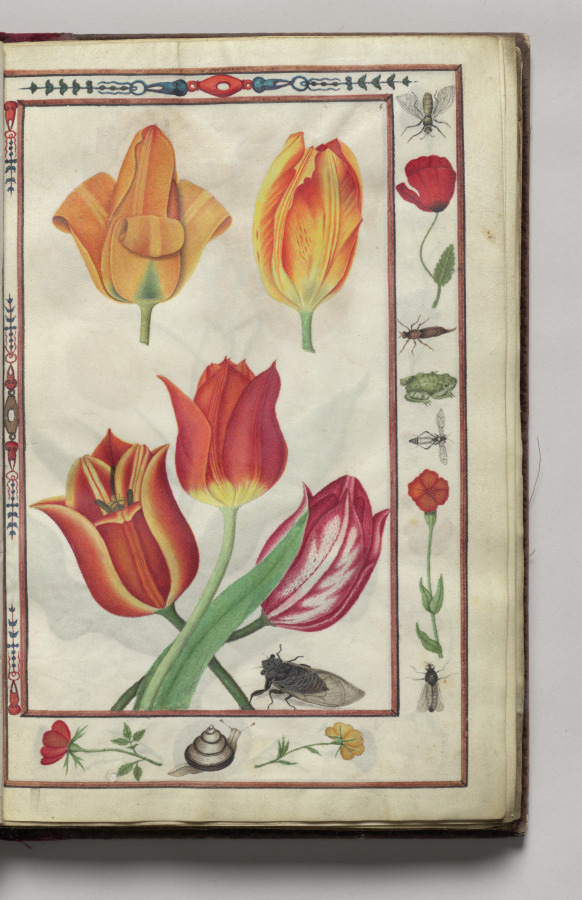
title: Tulips with Poppy, Carnation, Snail, Bug, and Frog Border, folio 3 (recto), from Florilegium (A Book of Flower Studies)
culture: France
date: 1608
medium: watercolor, ink, silver, and gold over occasional traces of pencil, on vellum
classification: Bound Volume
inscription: Dated: Poitiers 1608 (on frontispiece) Signed: On frontispiece in black ink, lower right: Van Kuyk Notation on drawing: Frontispiece: in pencil, lower margin: * élève de Van Kessel, peintre flammand (* in pencil also appears in front of Van Kuyk's name).